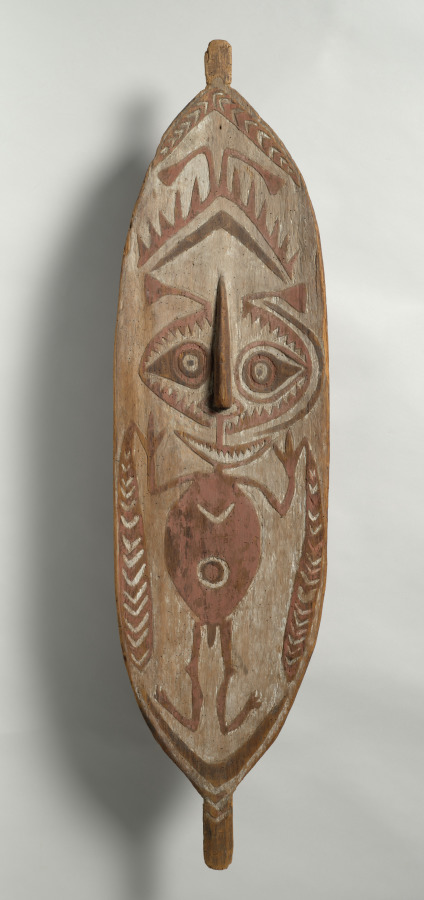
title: Spirit Board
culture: Melanesia, Papua New Guinea, Papuan Gulf, Elema District, 20th century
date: before 1930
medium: painted wood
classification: Sculpture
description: Like other sacred obejcts, spirit boards were displayed in Elema men's houses. Each board was named after the bush spirit who inhabited it.